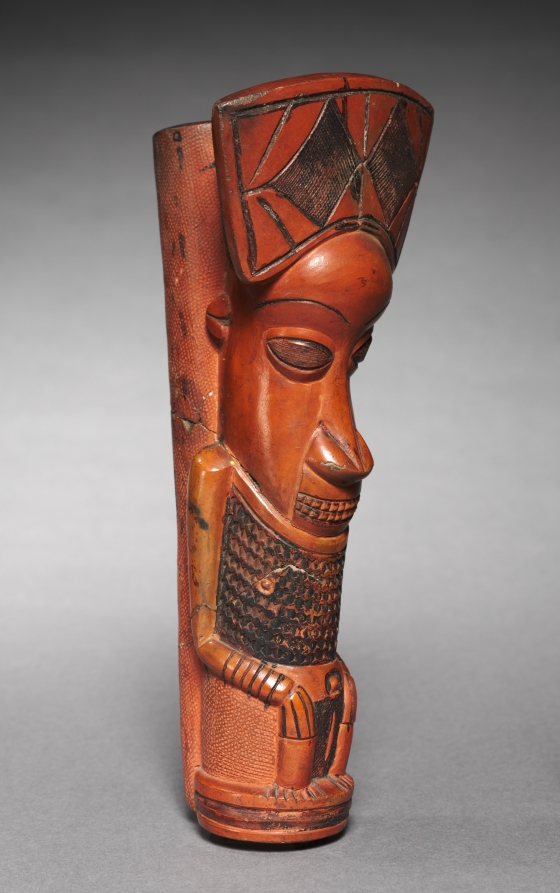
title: Pipe Bowl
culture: Equatorial Africa, Cameroon, Bali, 20th century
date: before 1935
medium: Ceramic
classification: Implements